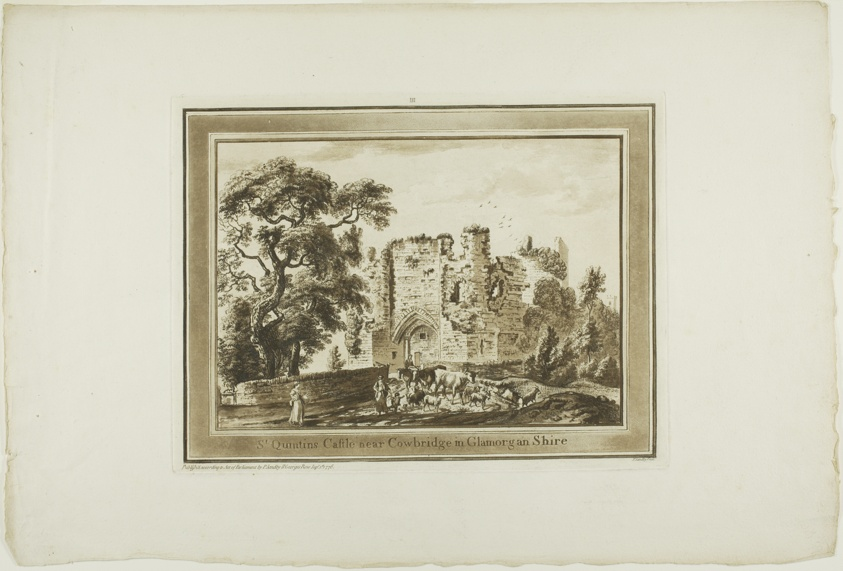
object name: Print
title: St Quintin's Castle near Cowbridge in Glamorgan Shire, plate three from Twelve Views in South Wales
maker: Paul Sandby (English, 1731-1809)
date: 1775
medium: Aquatint with etching on ivory laid paper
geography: England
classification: aquatint; print; prints and drawing